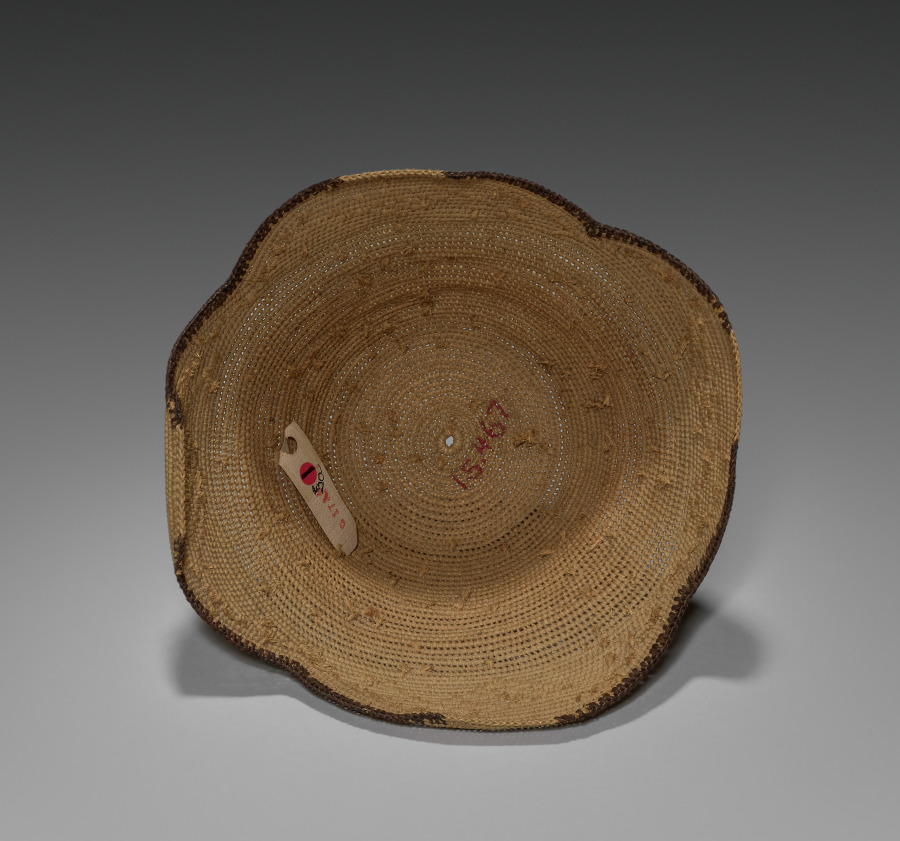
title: Hat (laket)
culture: Africa, Central Africa, Democratic Republic of the Congo, Kuba-style maker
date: early 1900s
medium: Raffia and dye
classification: Garment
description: Titled Kuba men and prominent women wear the laket, a small ornate dome-shaped hat. An essential fashion item of adult men in good social standing, it focuses special attention on the head as a significant marker of individual identity, ethnic affiliation, status, and role in society. This prestige object is secured on the crown of the head with a nine-and-a-half-inch metal pin that pierces through the hat onto a clump of hair. This laket is made from raffia palm fiber coiled into threads and woven in different patterns. There are two examples of the laket: the plain type with the flat top, and the more elaborate type called the laket mishiing.